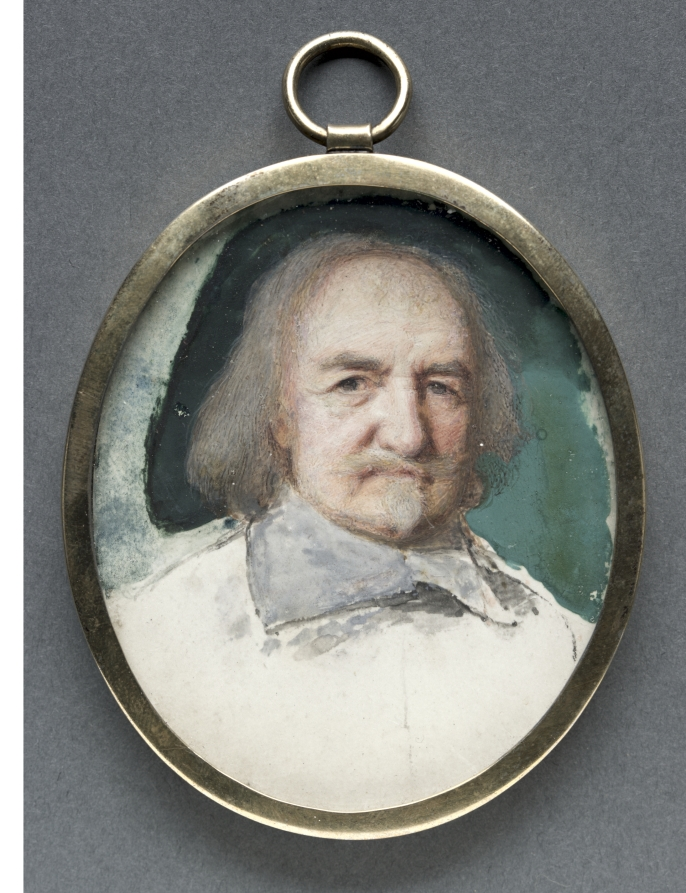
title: Portrait of Thomas Hobbes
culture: England, 17th century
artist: Samuel Cooper (British, 1608/09–1672)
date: c. 1660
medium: watercolor on vellum in a gilt metal frame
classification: Portrait Miniature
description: In his seventies when the portrait was painted, Thomas Hobbes (1588–1679) is turned slightly to his left, his eyes directed at the spectator. He has thin gray hair extending to his collar and a gray mustache and goatee. Only his head is finished; a thin gray wash loosely describes a plain, flat collar. Hobbes was born in Malmesbury, Wiltshire. In spite of humble parentage, he rose to prominence as a brilliant linguist and author of the 1651 book Leviathan, a seminal work of social contract theory that advocated for government led by a strong sovereign. As a royalist he was forced to flee England when the civil war broke out in 1642, and he resided in France until the war’s end in 1651. He was a friend of Cooper, who painted his miniature on at least two occasions.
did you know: A replica of Cleveland’s miniature was painted by Lady Margaret Bingham, Countess of Lucan.